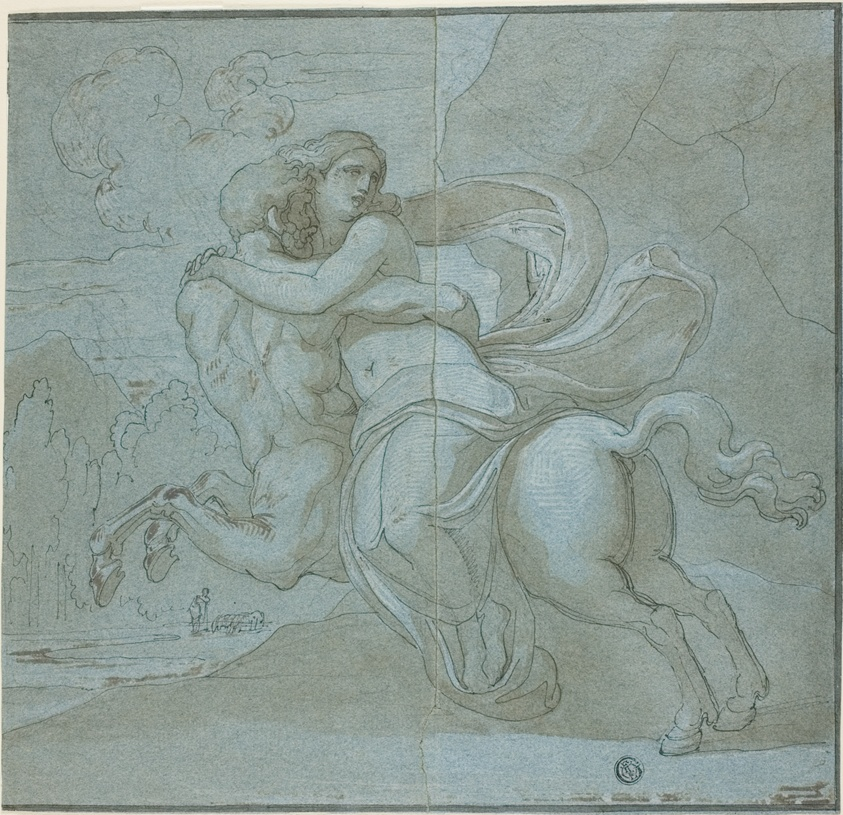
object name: Drawing and Watercolor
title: Nessus and Deianira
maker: Circle of Vincenzo Camuccini (Italian, 1771-1844)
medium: Pen and black ink, with brush and pale brown wash, over black chalk, heightened with lead white (discolored), on blue laid paper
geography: Italy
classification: pen and ink drawings; drawings (visual works); prints and drawing